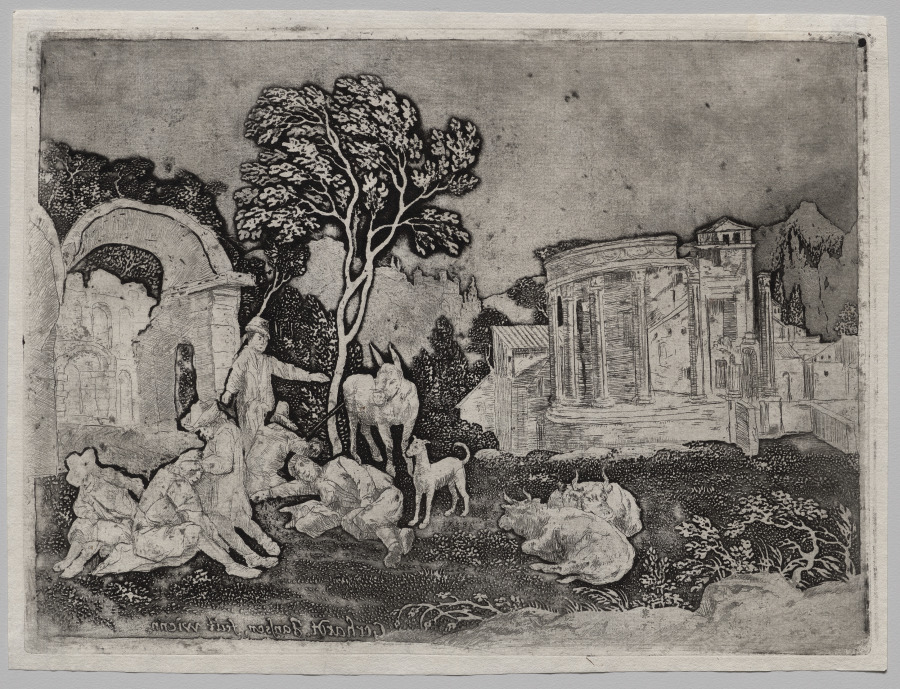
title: Pastoral Landscape with Ruins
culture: Netherlands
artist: Gerhardt Janssen (Dutch, 1636–1725)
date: c. 1722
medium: etching and open-bite on laid paper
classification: Print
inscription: Signed, lower left, in plate: Gerhardt Janssen. fecit Wienn [in reverse]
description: Janssen’s prints depict figures, trees, and architectural details rendered light against a dark background, a reverse effect of the typical etching of the period, which reminds our modern eye of a photographic negative. The artist might have been familiar with such a reversal of light and dark through the practice of reverse glass painting, in which he was trained, and indeed, the figures glow with an idiosyncratic solarizing effect, almost as if they are part of a window. The technique was apparently invented by Janssen and is unique in early modern art.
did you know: This print was made from an iron print plate that was etched in acid in stages, creating a textured, almost corrosive effect.